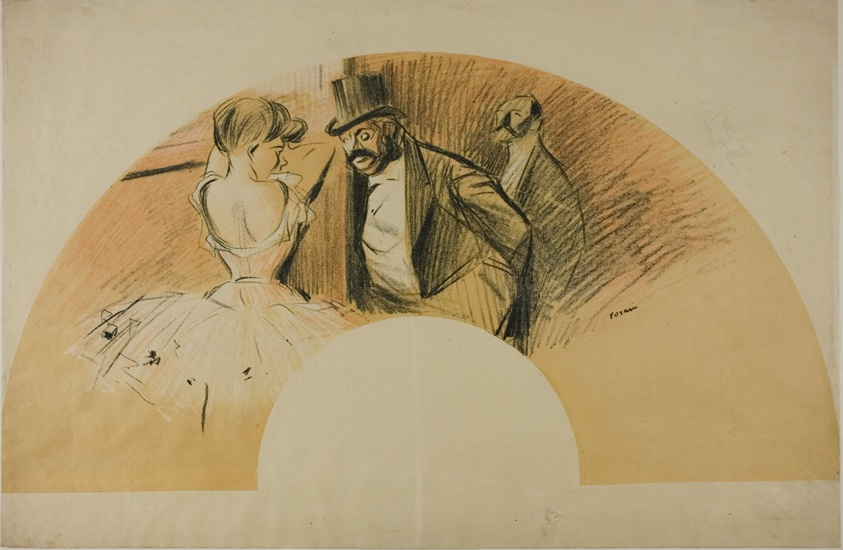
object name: Print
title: Fan for the Gavarni Ball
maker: Jean Louis Forain (French, 1852-1931)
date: 1903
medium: Color lithograph in black, white, orange, and red on cream wove paper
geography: France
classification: lithograph; print; prints and drawing